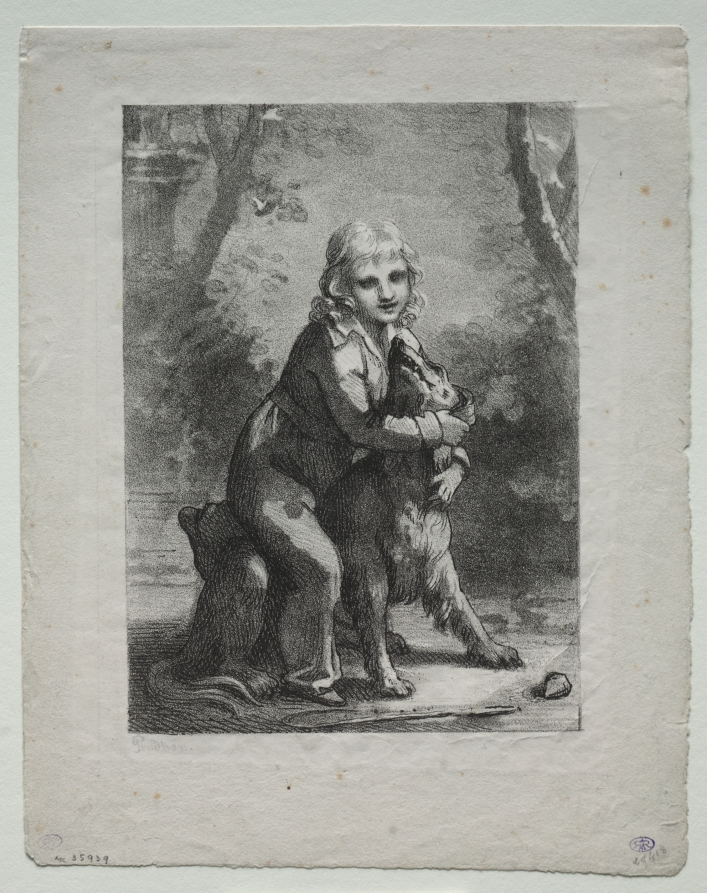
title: Boy with a Dog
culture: France, 19th century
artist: Pierre-Paul Prud'hon (French, 1758–1823)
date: 1822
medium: lithograph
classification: Print